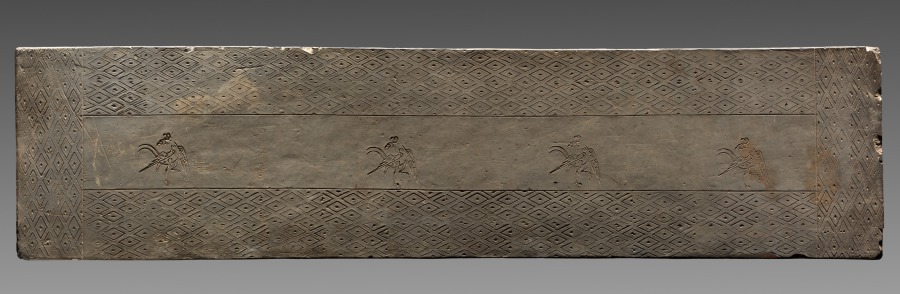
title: Tomb Tile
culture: China, Henan province, Jincun, Eastern Zhou dynasty (770–256 BCE)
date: 771–256 BCE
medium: earthenware with stamped decoration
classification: Ceramic